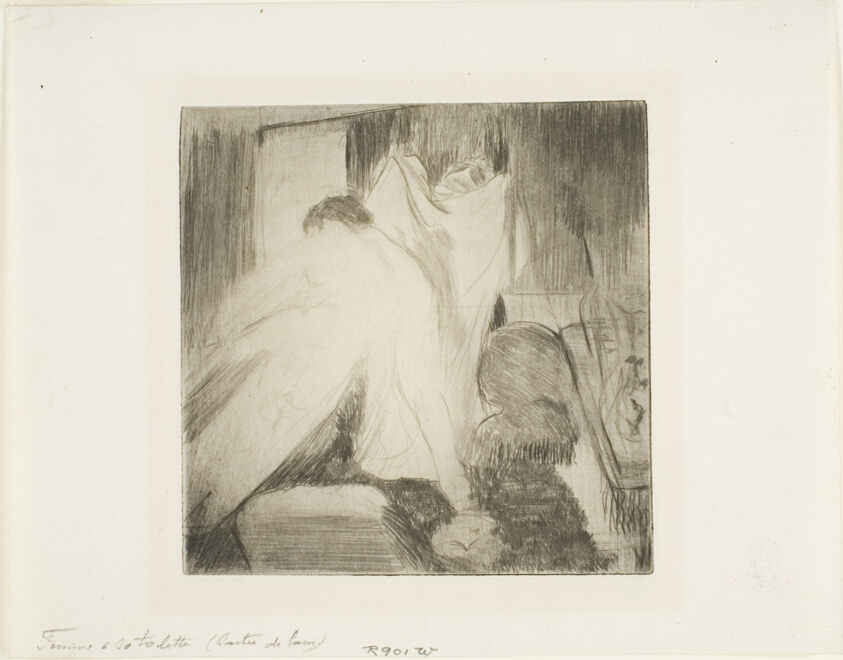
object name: Print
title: Leaving the Bath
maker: Edgar Degas; French, 1834-1917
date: 1879–80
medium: Drypoint and aquatint on ivory laid paper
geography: France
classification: drypoint; print; prints and drawing; paper